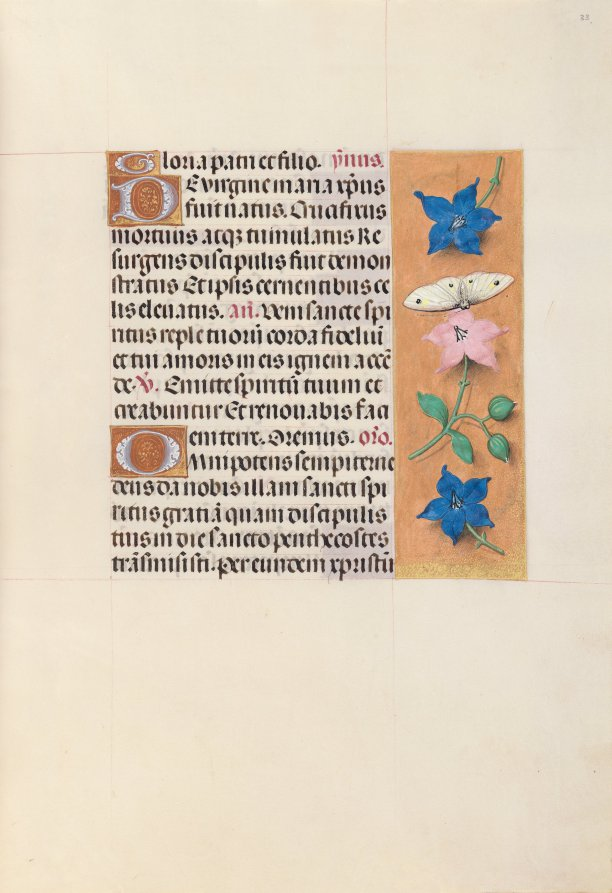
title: Hours of Queen Isabella the Catholic, Queen of Spain: Fol. 33r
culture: Flanders, Ghent and Bruges, late 15th century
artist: Master of the First Prayerbook of Maximillian (Flemish, c. 1444–1519)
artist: and Associates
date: c. 1500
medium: ink, tempera, and gold on vellum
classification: Bound Volume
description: A great lover of Flemish art, Queen Isabella treasured her many devotional books. This deluxe manuscript was created for her private devotions by highly organized and distinctly talented manuscript painters active in Ghent and Bruges. The Ghent-Bruges school represents the culmination of Flemish book painting, whose main features were the use of rich colors, illusionistic effects, a love of landscape, and a strong sense of visual narrative. Manuscripts produced by this circle of artists are renowned for their border decoration featuring a rich variety of realistically painted flowers, scrolling acanthus leaves, birds, and butterflies.